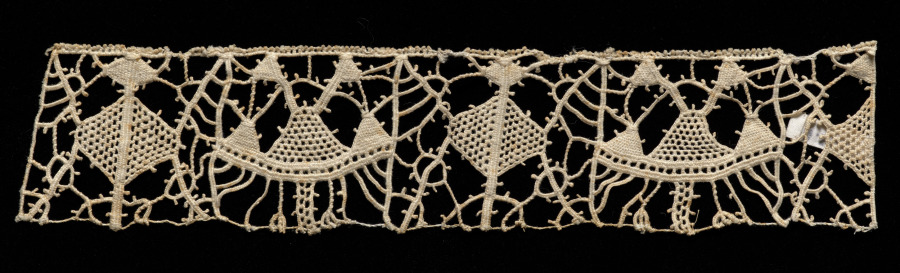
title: Lace Fragment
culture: Italy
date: 1800s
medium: Cotton(?): needle lace (punto in aria) insertion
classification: Lace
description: The motifs in this lace fragment are of a double-headed eagle.